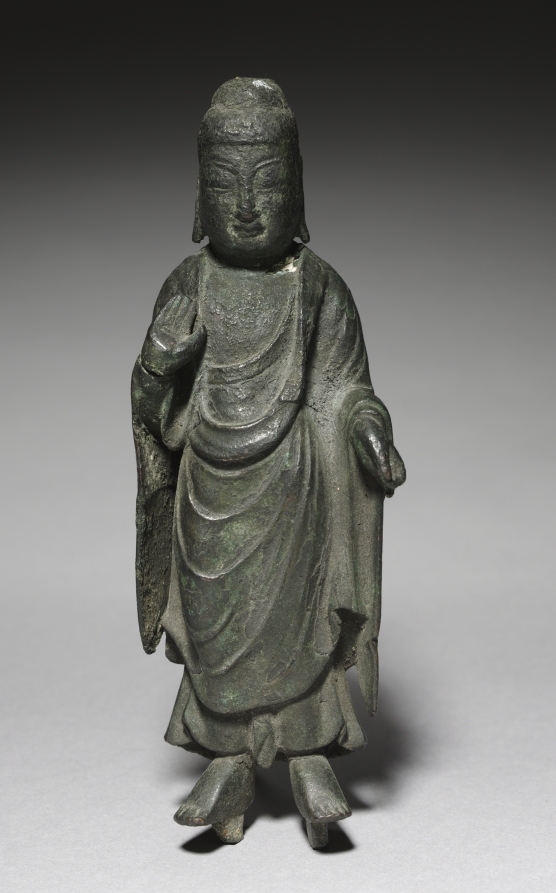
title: Standing Buddha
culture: Korea, Unified Silla period (676-935)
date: 676–935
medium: bronze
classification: Sculpture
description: This kind of miniature statue was often used as a portable object of devotion by traveling Buddhist monks.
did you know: Created during the Unified Silla period, a high point of the spread of Buddhist teachings, this kind of miniature statue was often used as a portable object of devotion by traveling Buddhist monks.